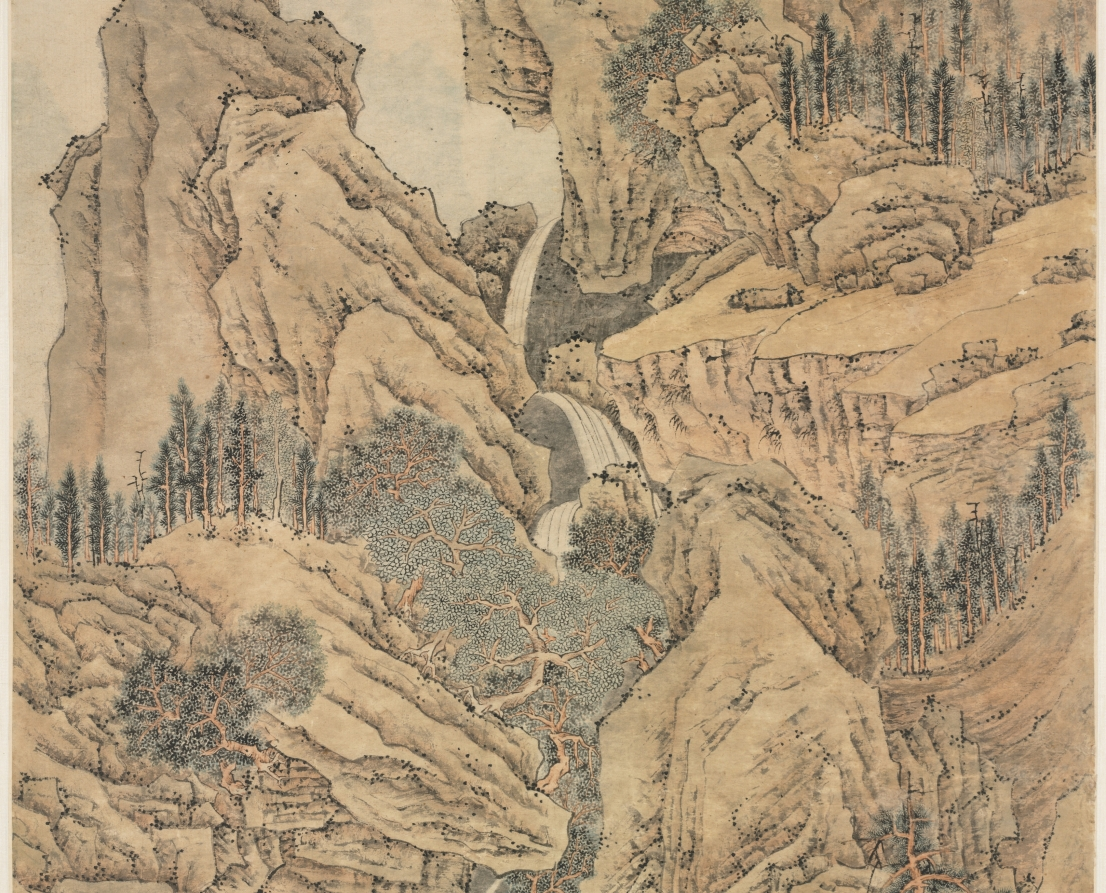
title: Playing the Qin in a Secluded Valley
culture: China, Ming dynasty (1368–1644)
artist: imitator of Wen Zhengming (Chinese, 1470–1559)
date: 1548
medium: hanging scroll; ink and light color on paper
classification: Painting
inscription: 幽壑鳴琴。 萬疊高山供道眼，千尋飛瀑淨塵心。 憑將一曲朱絃琴，小答松風太古音。 嘉慶戊申夏四月徵明製 [印] 徵明; 徵仲父印 [右下方] 悟言室印; 衡山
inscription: 4 additional seals: 3 of Cheng Qi 程琦 (1911–1988); 1 unidentified.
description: The poem inscribed in this painting reads: "Ten thousand layered lofty mountains are presented to the cultivated eye, A thousand feet of cascading falls cleanse the dusty heart. May the harmonies of my red-stringed tune Be the humble answer to the pine wind's ancient song." Different versions of this painting exist. Scholars have suggested that the solid renderings of the rock masses and the volumetric mountain configurations as seen here appear more characteristic of Lu Zhi 陸治 (1496–1576), Wen Zhengming's pupil.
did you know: In paintings, Chinese literati often play the instrument in a landscape setting, as the sound of the qin symbolizes harmony between man and nature.